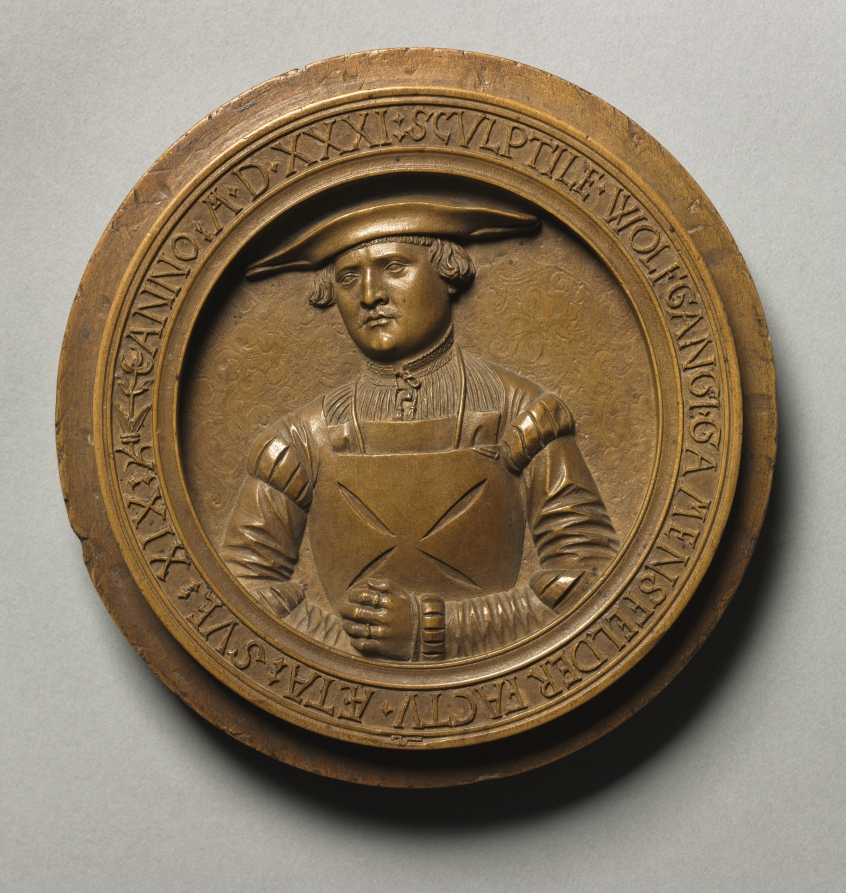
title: Model for a Portrait Medal of Wolfgang Gamensfelder at Age 19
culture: Germany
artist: Master of Gamensfelder (German)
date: 1531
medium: boxwood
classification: Sculpture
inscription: inscription at perimeter: SCULPTELE WOLFGANG GAMENSFELDER FACTU AETA SUE XIX ANNO AD XXXI.